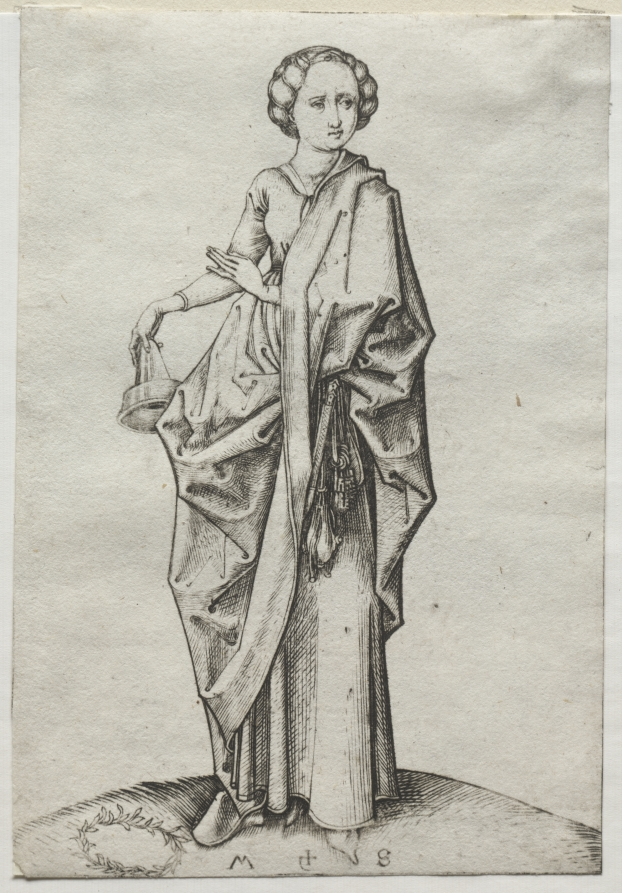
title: The Fourth of the Foolish Virgins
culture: Germany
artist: Martin Schongauer (German, c. 1450–1491)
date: 1469–79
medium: engraving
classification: Print